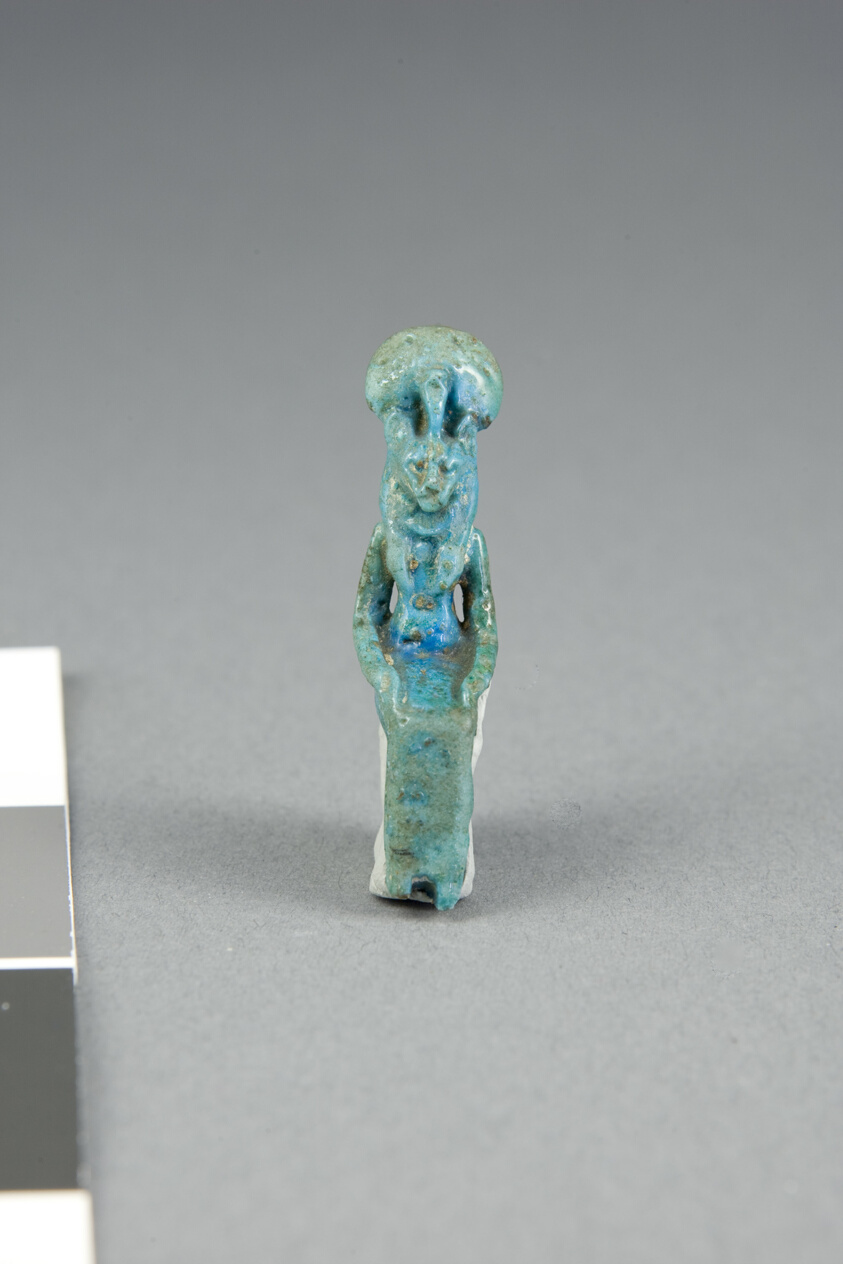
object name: Costume and Accessories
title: Amulet of the Seated Goddess Sekhmet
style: egyptian, ancient, new kingdom, third intermediate period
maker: Egyptian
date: New Kingdom–Third Intermediate Period (about 1050–664 BCE)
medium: Ceramic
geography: Egypt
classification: amulet; ceramics; jewelry; ancient art; costume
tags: goddesses, lions